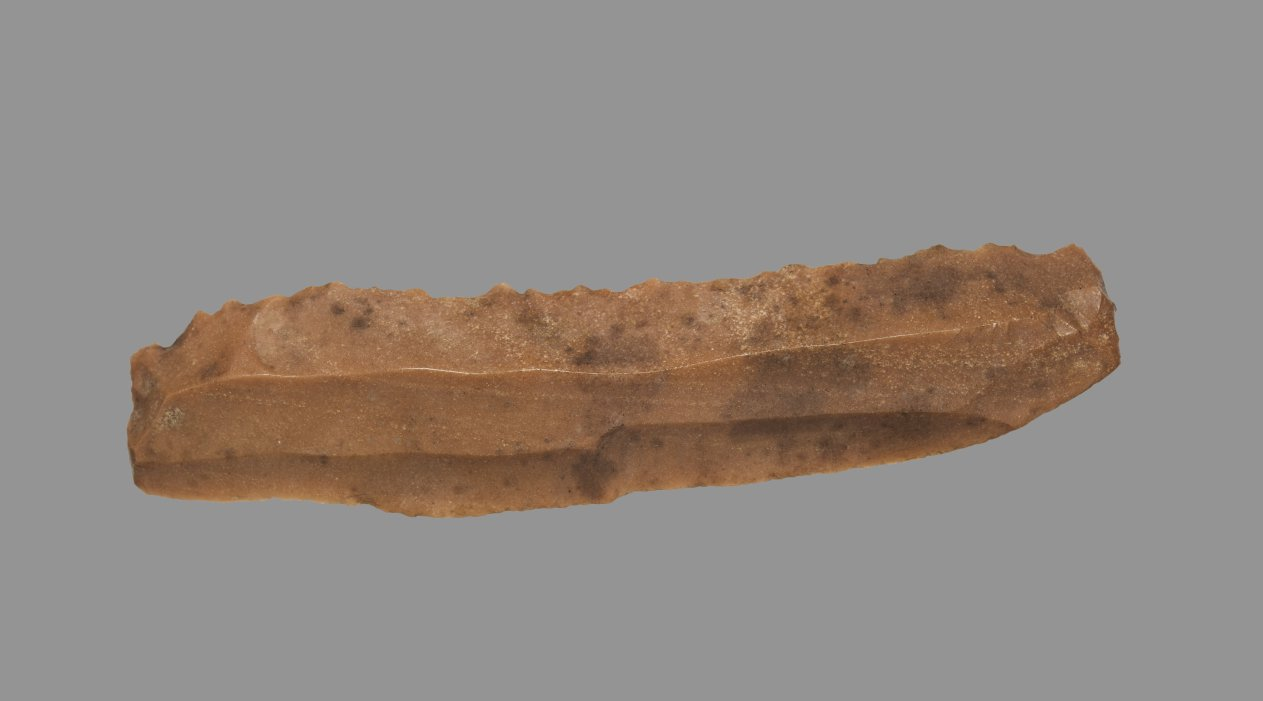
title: Sickle Blade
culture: Egypt, Middle Kingdom (2040–1648 BCE), Dynasty 12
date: 1980–1801 BCE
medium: flint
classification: Implements